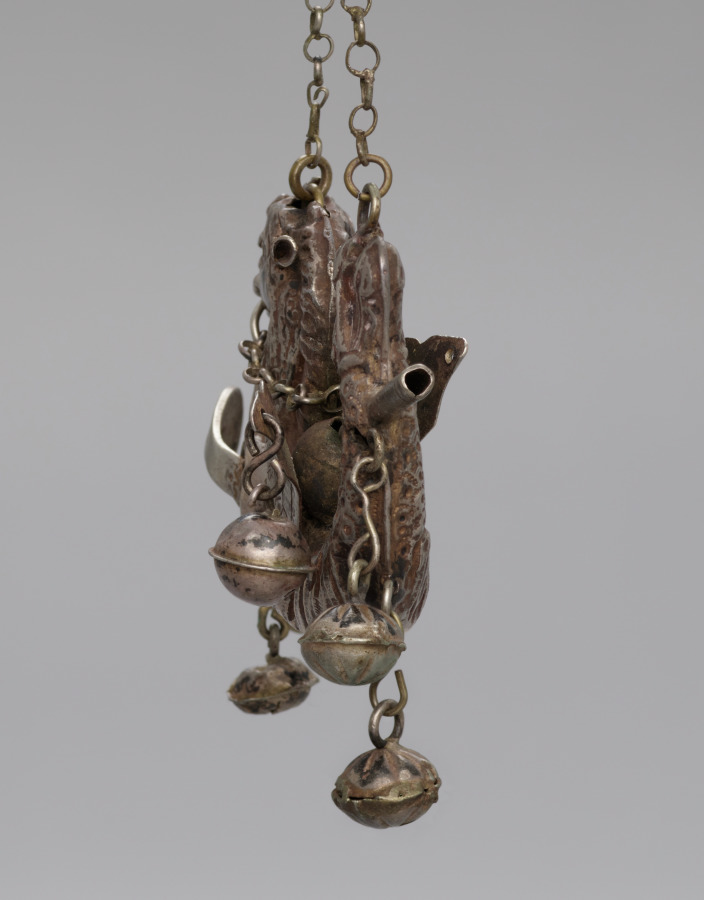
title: Rattle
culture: Italy, Sicily, 18th century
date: 1700s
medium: silver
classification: Silver